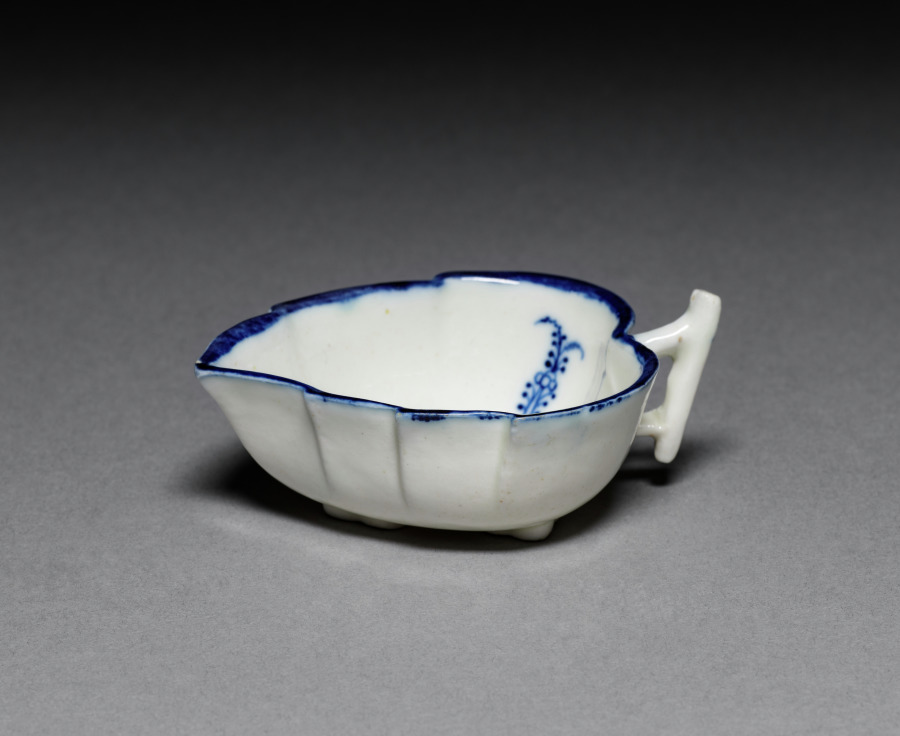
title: Leaf Dish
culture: France, 18th century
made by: Arras Porcelain Factory (French)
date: c. 1780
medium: soft-paste porcelain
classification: Ceramic